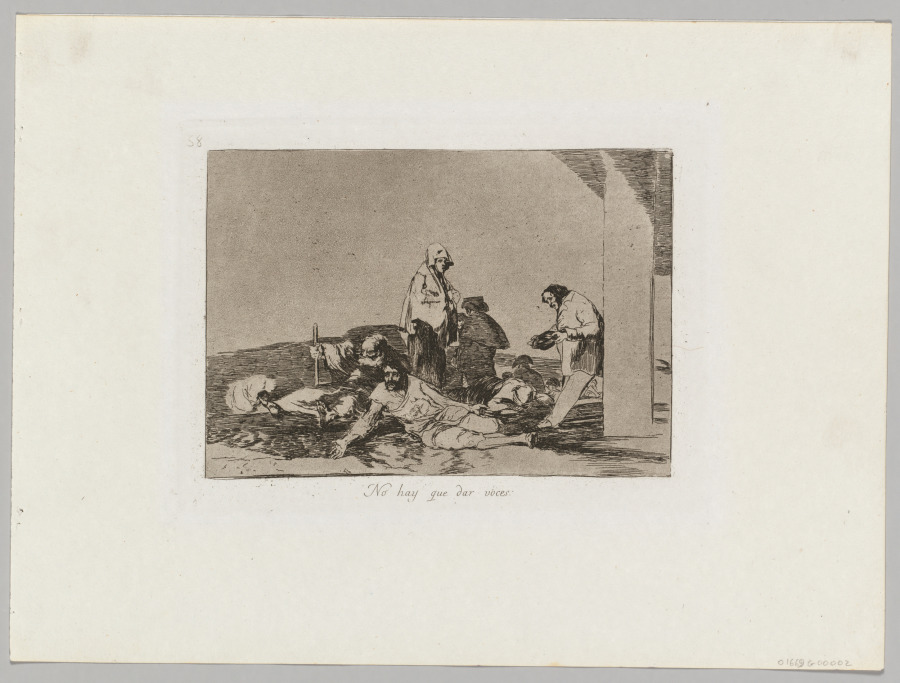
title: Disasters of War: Pl. 58, It is no use shouting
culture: Spain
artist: Francisco de Goya (Spanish, 1746–1828)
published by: Real Academia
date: 1810–1813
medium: Etching and aquatint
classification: Print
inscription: Bottom right, in graphite: 01669G00002; verso: lower right corner, upside down: G-43; In plate, below image, center: No hay que dar voces; in plate, above image, upper left: 58